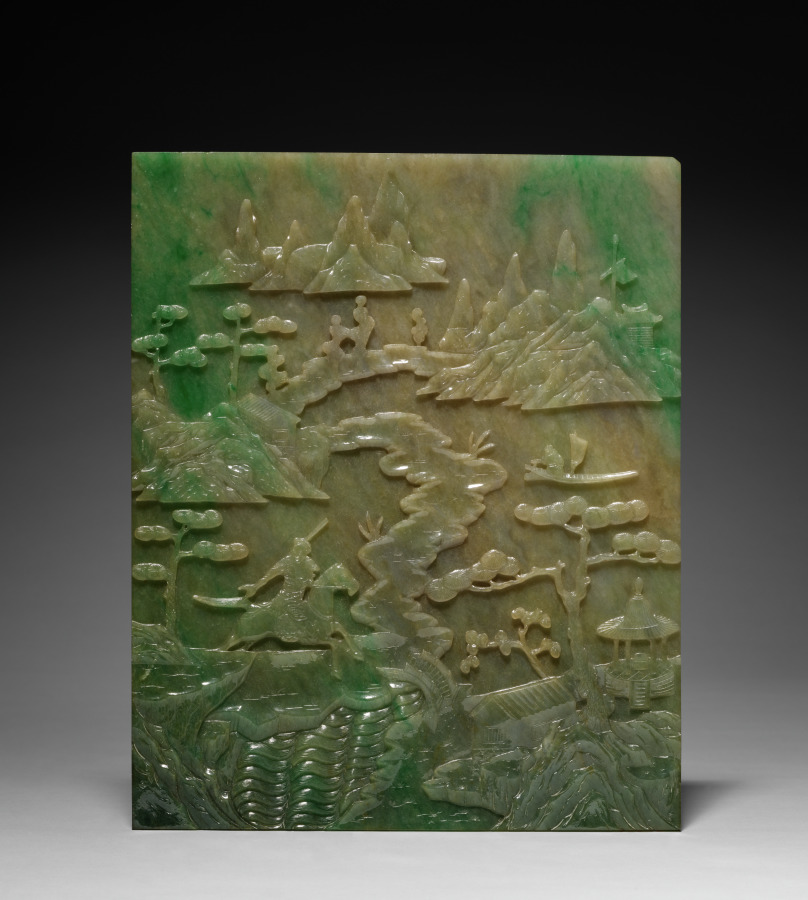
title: Table Screen with Stand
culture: China, Qing dynasty (1644-1911)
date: 1644–1911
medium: jade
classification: Jade